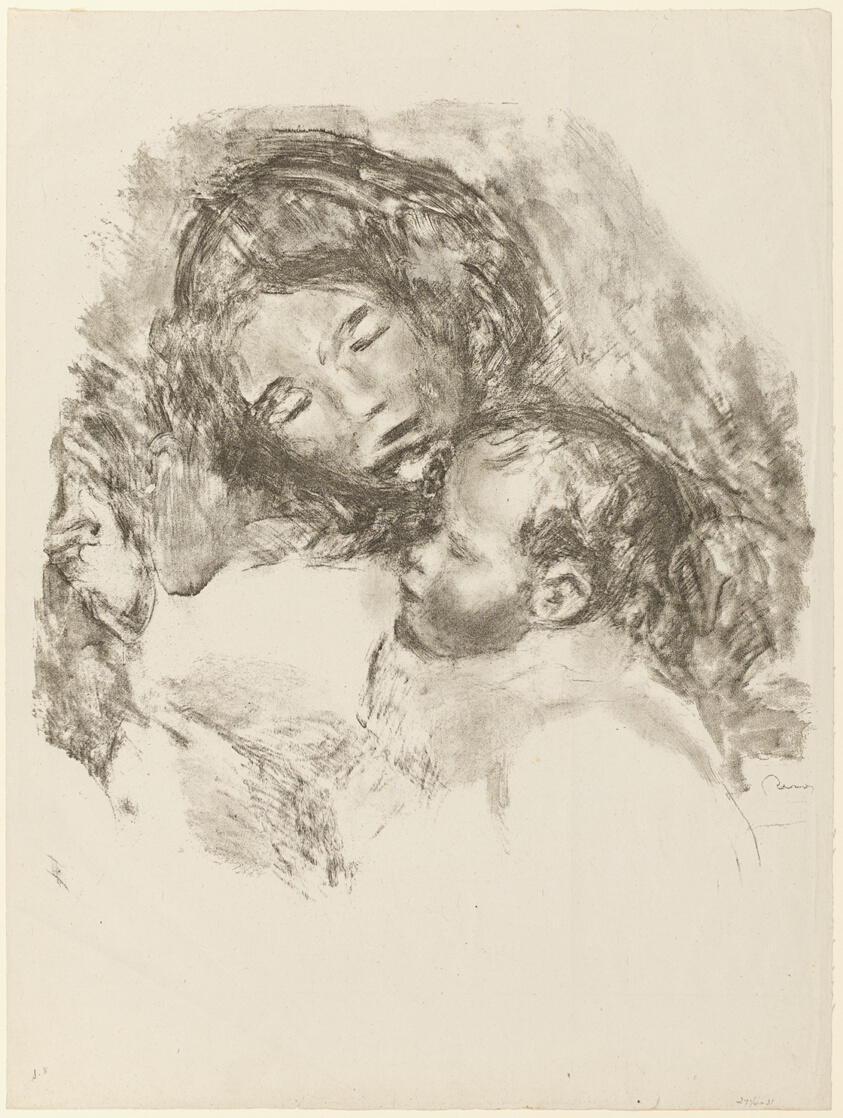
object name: Print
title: Maternity, large plate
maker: Pierre Auguste Renoir; French, 1841-1919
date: c. 1912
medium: Lithograph from two stones in black and gray on gray chine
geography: France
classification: lithograph; print; prints and drawing